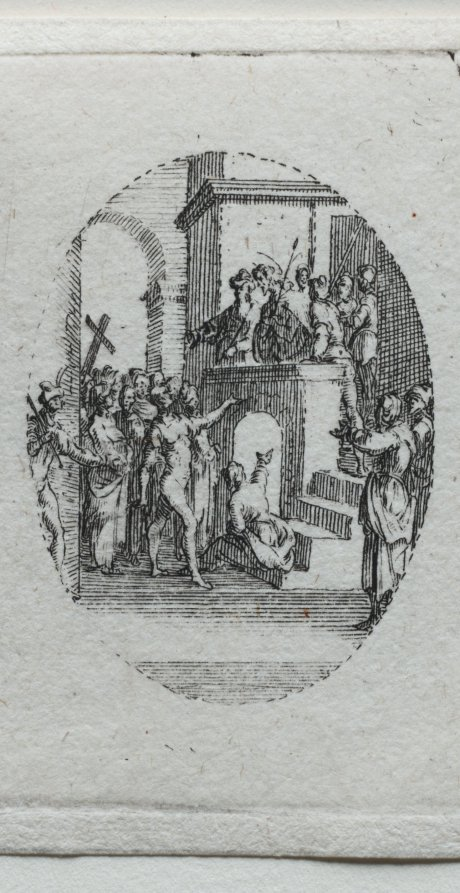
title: The Mysteries of the Passion: Christ Presented to the People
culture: France, 17th century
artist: Jacques Callot (French, 1592–1635)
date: 1631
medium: etching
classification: Print